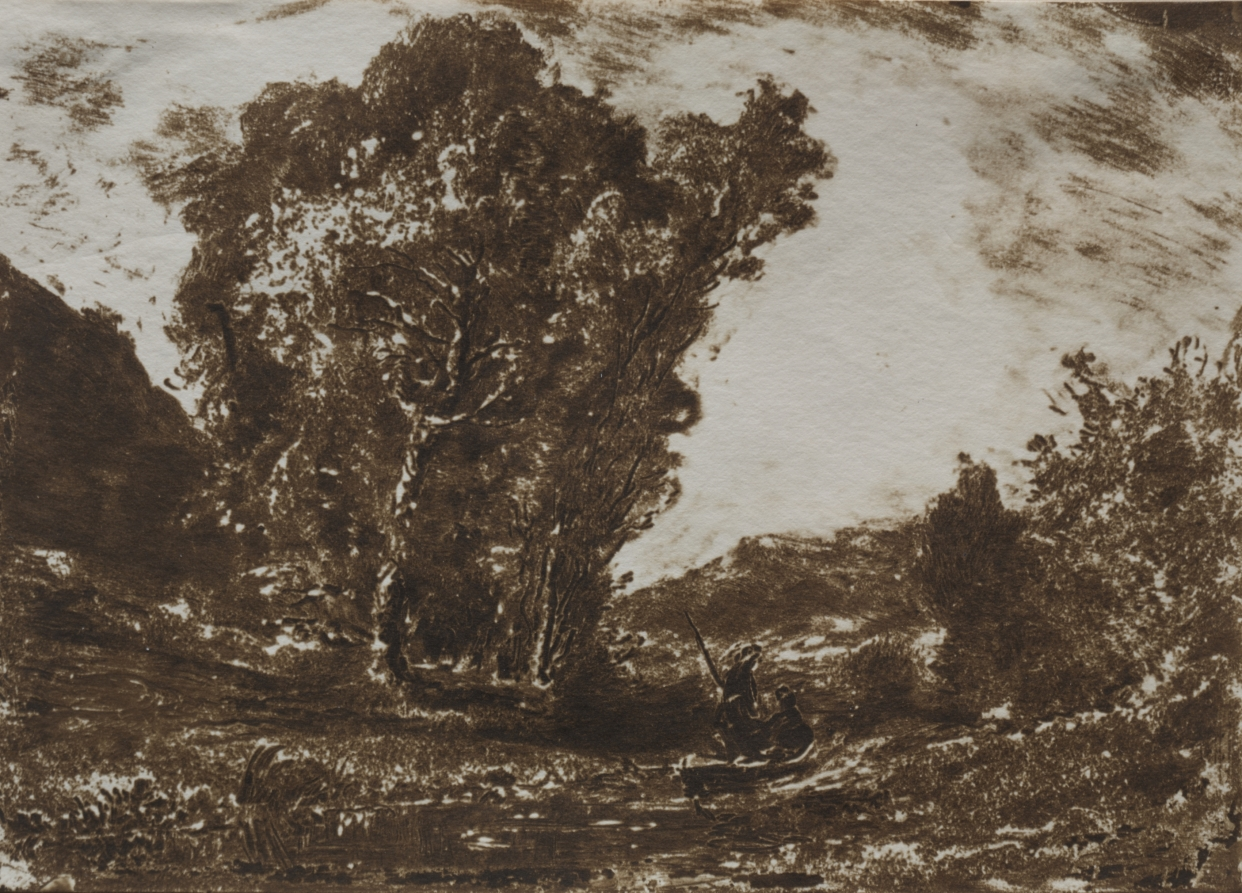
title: Two Boatmen in a Marsh near a Cluster of Trees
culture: France, 19th century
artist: Henri-Joseph-Constant Dutilleux (French, 1807–1865)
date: c. 1857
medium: cliché-verre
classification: Print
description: Unlike most cliché-verres, which are similar to line drawings, Dutilleux's thirteen works in this medium are extremely tonal. The artist described them as "monochrome paintings on glass for photography." Instead of scratching the design into the opaque ground covering the glass plate, as Corot or Daubigny had done, Dutilleux created the image by painting the plate with it.